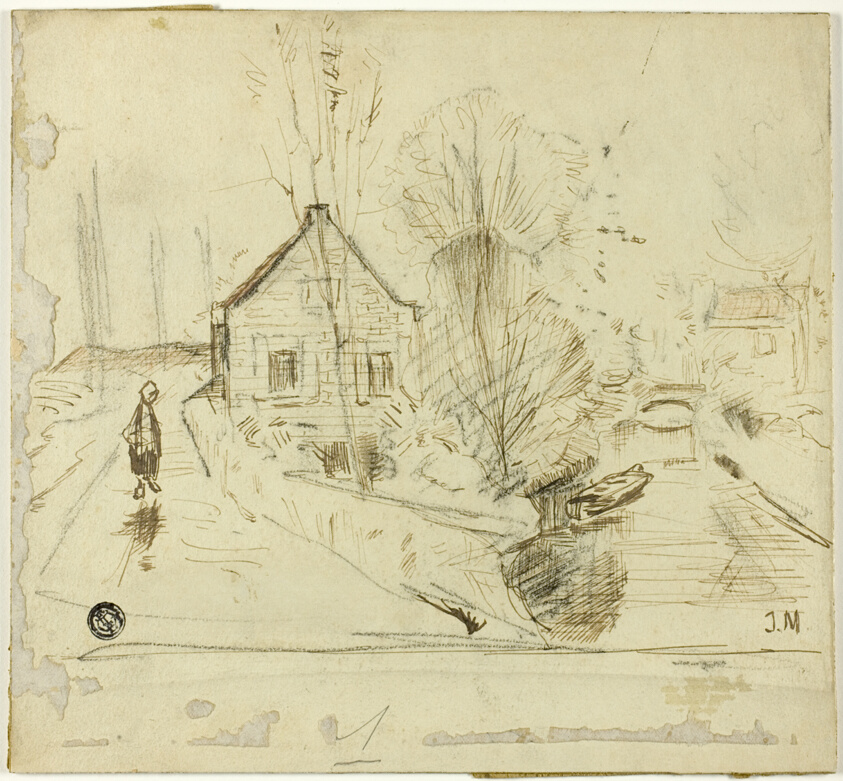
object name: Drawing and Watercolor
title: Figure on Road by House and Canal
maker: Imitator of Jacob Henricus Maris (Dutch, 1838-1899)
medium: Pen and brown ink, with black pastel, on ivory wove paper, laid down on board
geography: Holland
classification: pen and ink drawings; drawings (visual works); prints and drawing